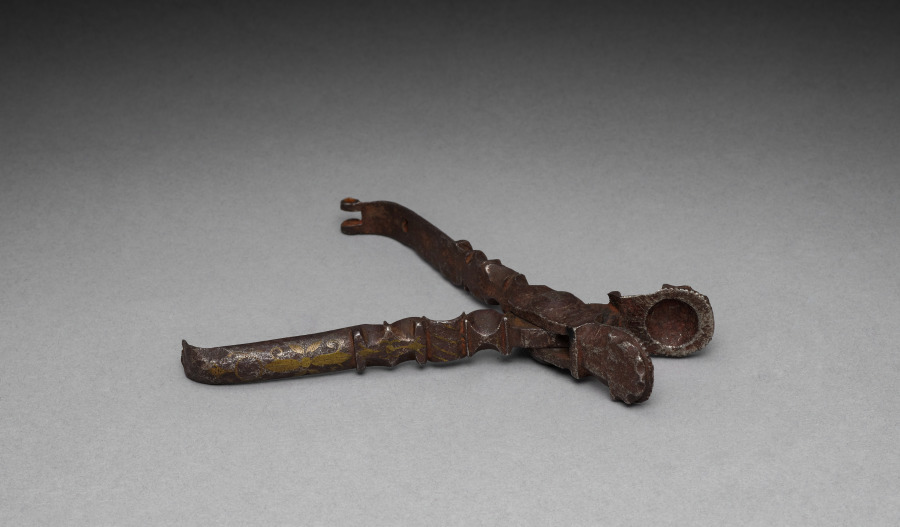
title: Bullet-mould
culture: Unassigned, early 18th Century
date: c. 1700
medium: steel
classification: Arms and Armor